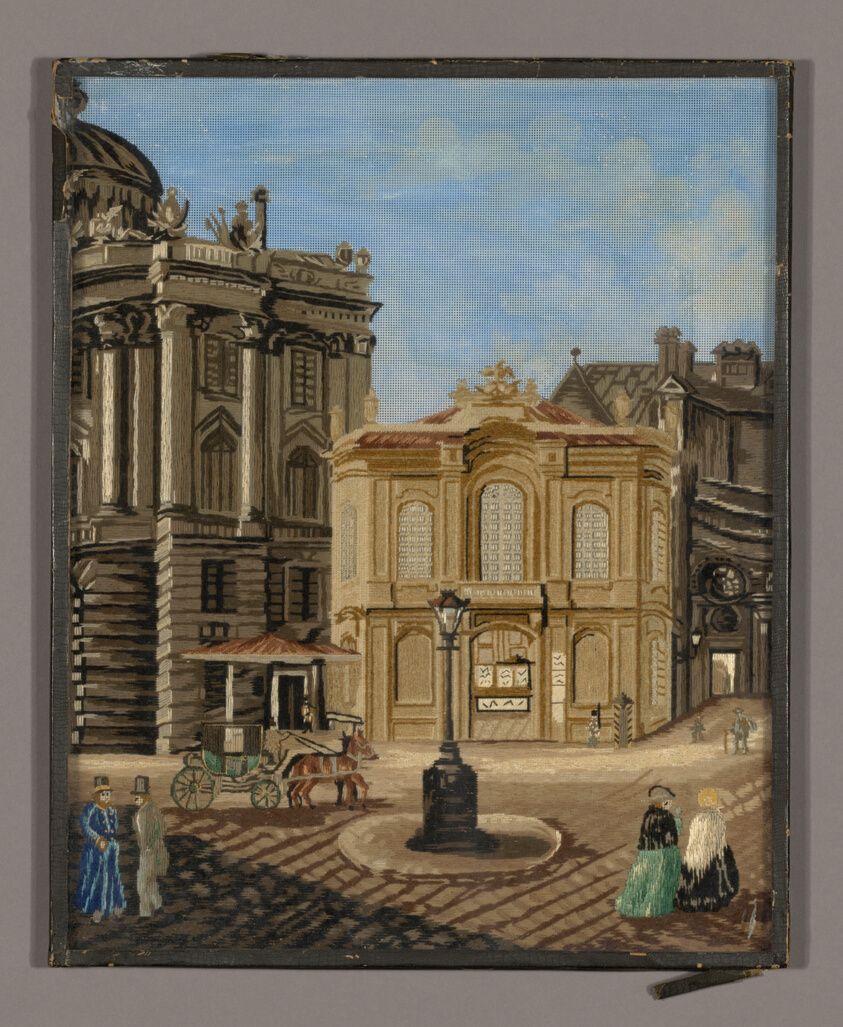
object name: Textile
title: Needlework Picture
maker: Austria, Vienna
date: 1875/1900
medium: Punched needlework ground; painted; embroidered in silk and wool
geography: Vienna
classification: textile; needlework (visual works)